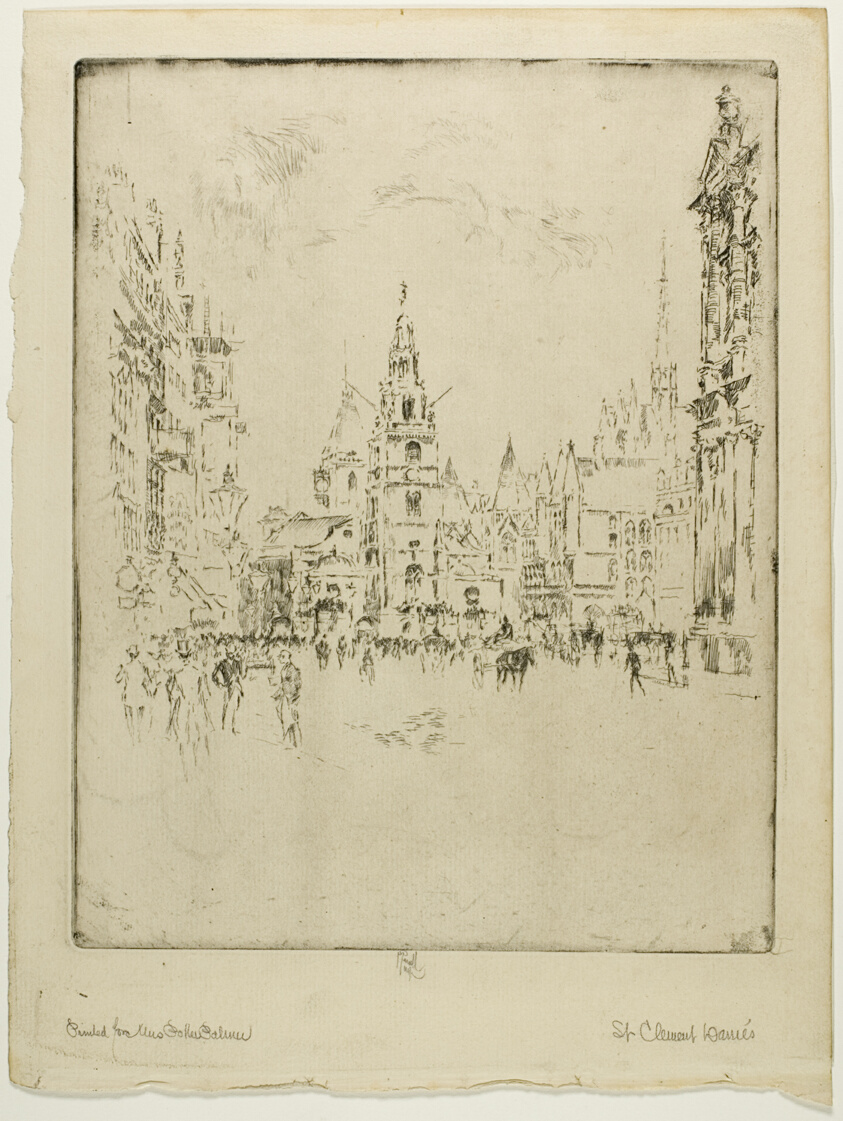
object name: Print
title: St. Clements Danes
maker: Joseph Pennell (American, 1857-1926)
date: 1906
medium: Etching on ivory laid paper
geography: United States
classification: etching; print; prints and drawing